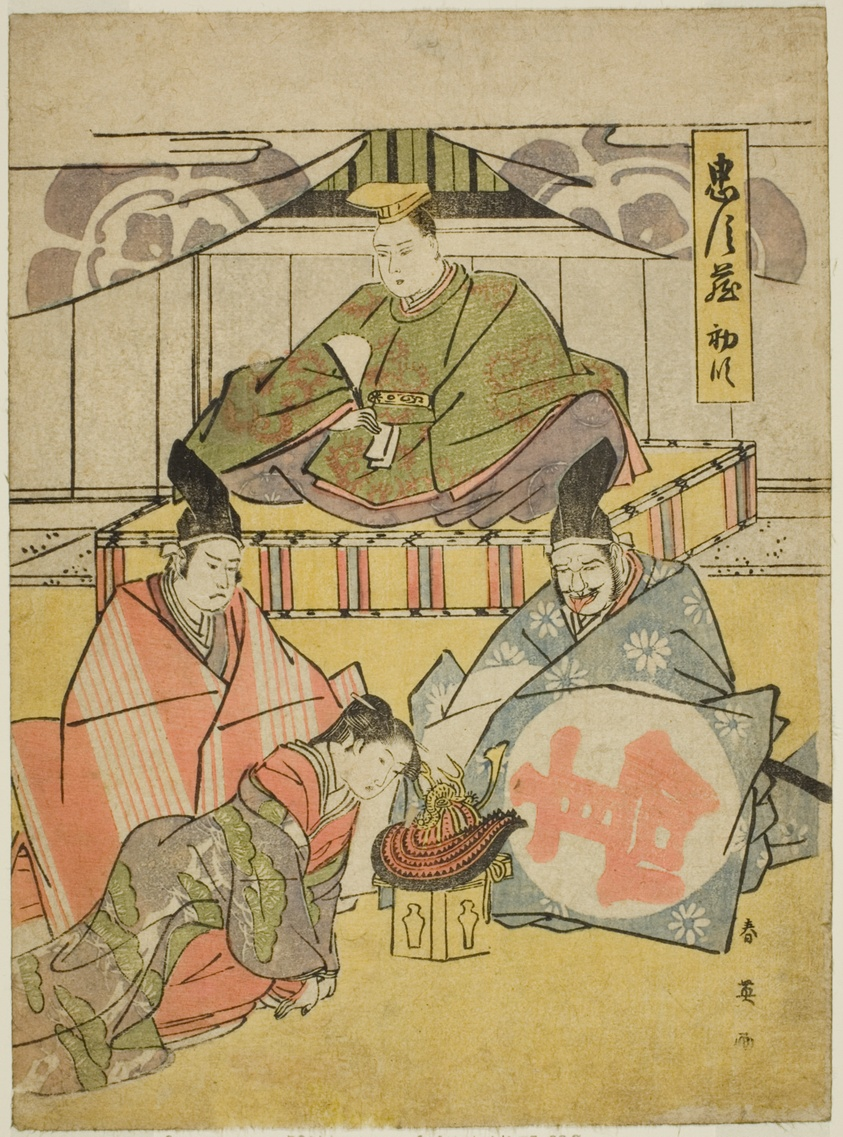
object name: Print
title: Act One: Tsurugaoka Hachiman Shrine from the play Chushingura (Treasury of the Forty-seven Loyal Retainers)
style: Japanese (culture or style)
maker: Katsukawa Shun'ei (Japanese, 1762-1819)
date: c. 1795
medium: Color woodblock print; koban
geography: Japan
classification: woodblock print; print; asian art